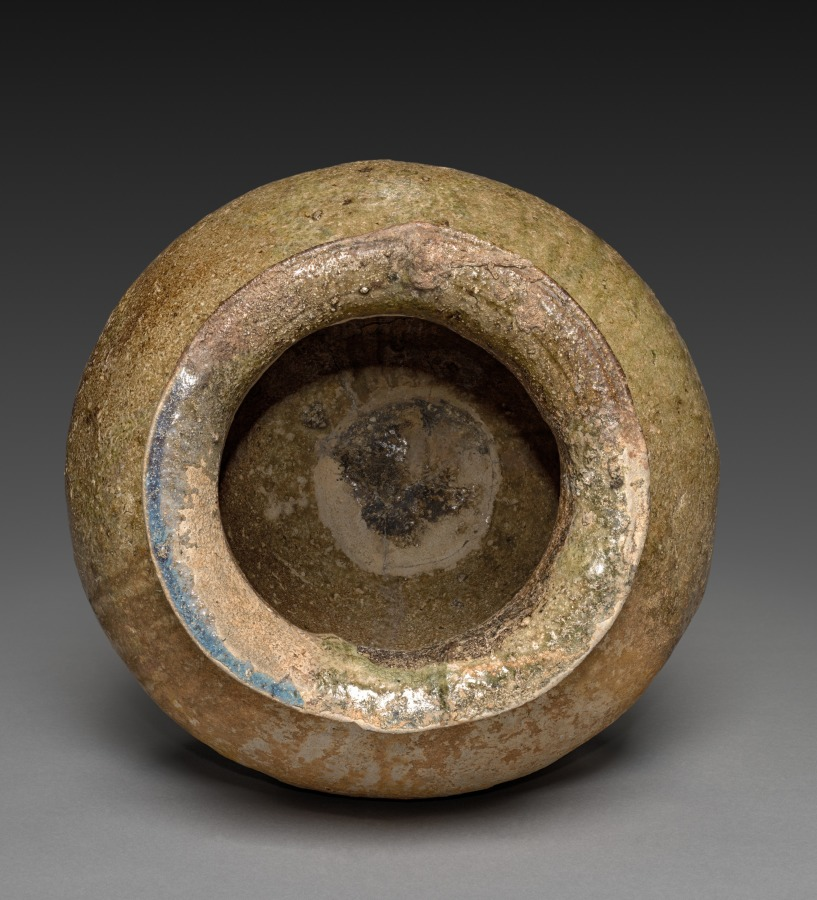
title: Storage Vessel: Tokoname Ware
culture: Japan, Heian period (794–1185)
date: 1100s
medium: stoneware with natural ash glaze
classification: Ceramic